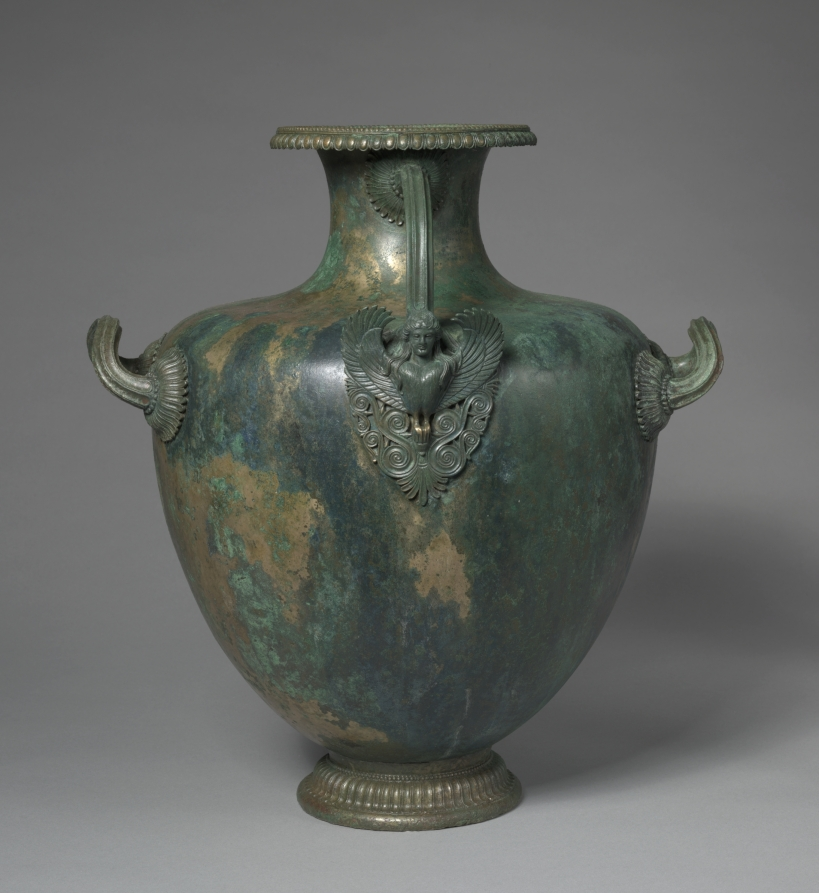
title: Hydria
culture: Greece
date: 425–400 BCE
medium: bronze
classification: Metalwork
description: This vessel gets its name from a shape of earthenware jar that was used to carry water. This bronze hydria was probably used not to carry water but as a cinerary urn (kalpis). The figure on the handle is the mythological siren, a human-headed bird.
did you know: This bronze vessel was likely used as a funerary urn.